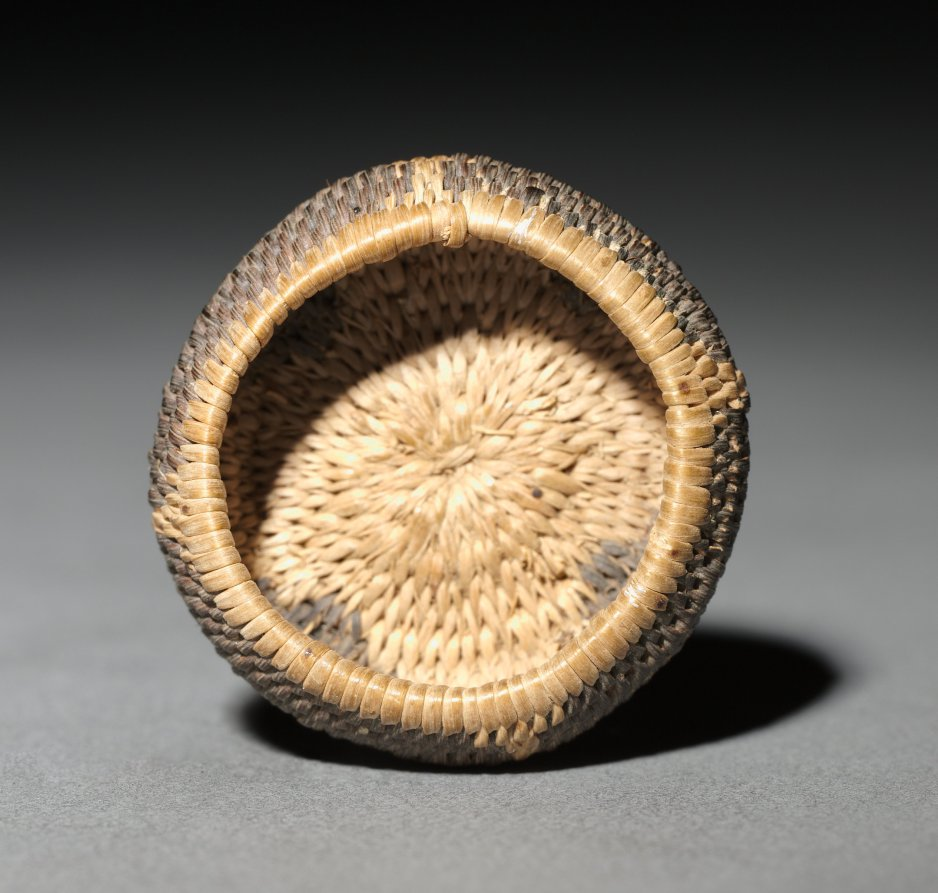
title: Miniature Basket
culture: America, Native North American, Southwest, Arizona, Akimel O'odham (Pima), Unassigned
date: before 1923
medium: plant fiber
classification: Basketry